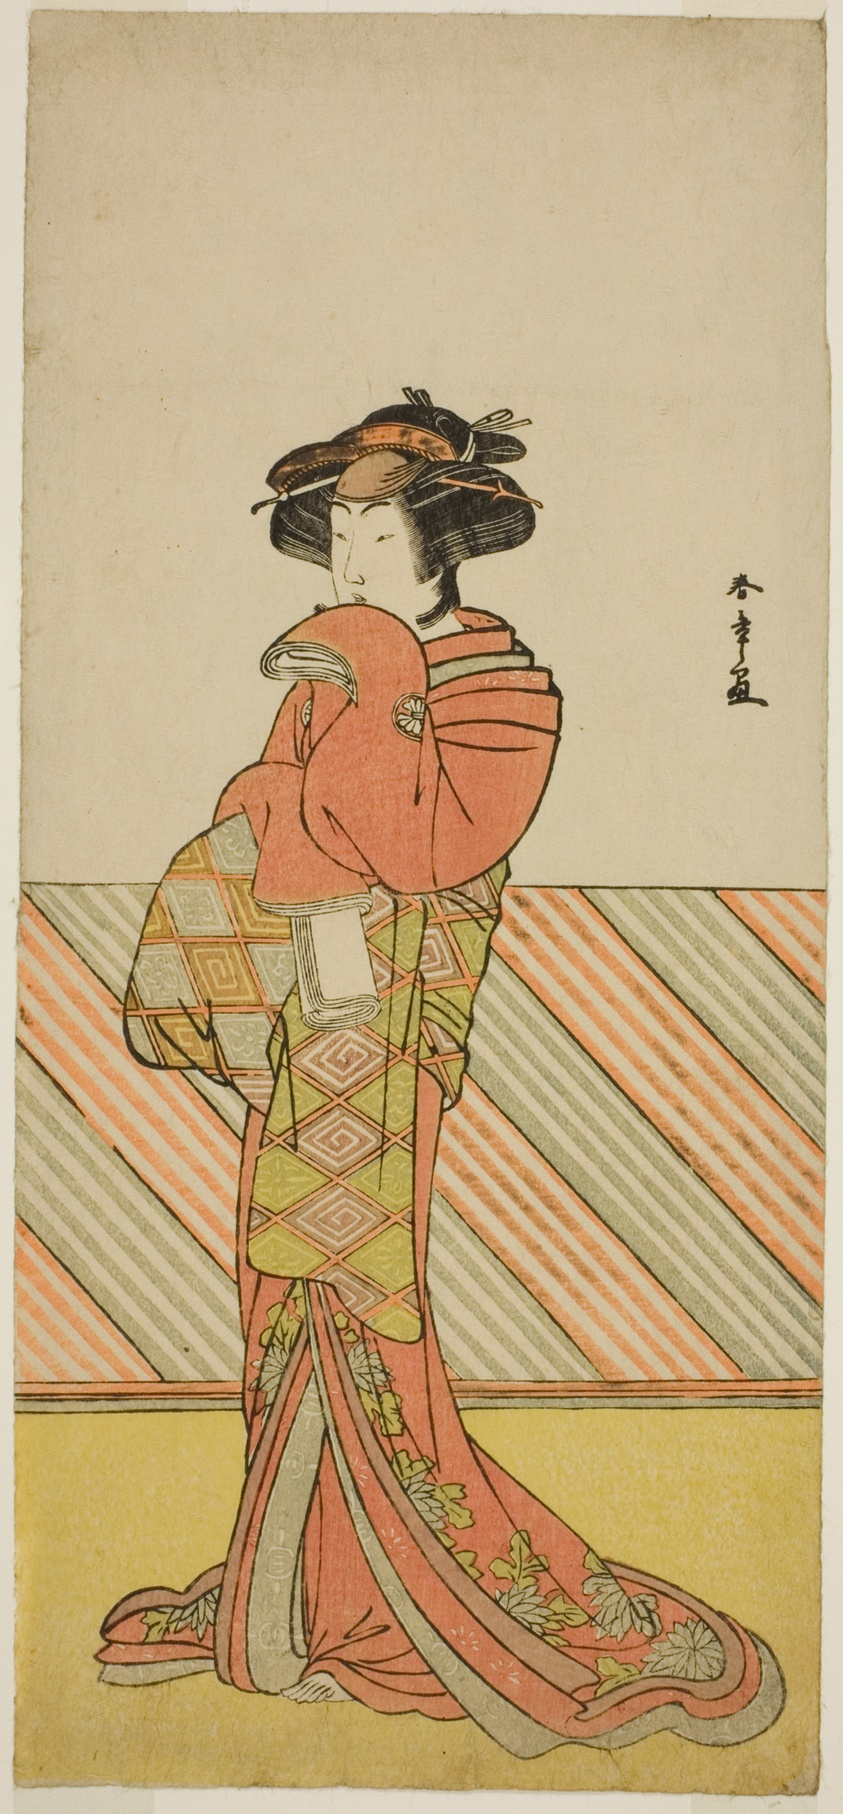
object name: Print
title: The Actor Segawa Kikunojo III in an Unidentified Role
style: Japanese (culture or style)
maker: Katsukawa Shunsho 勝川 春章; Japanese, 1726-1792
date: c. 1778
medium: Color woodblock print; hosoban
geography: Japan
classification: woodblock print; print; asian art